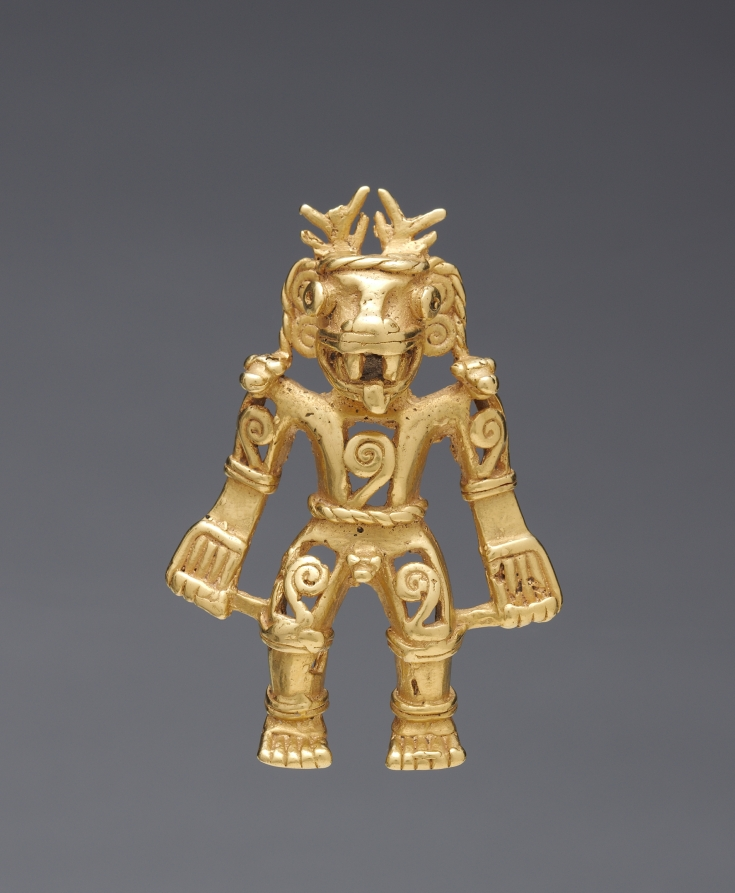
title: Figural Pendant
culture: Panama, Darién or Venado Beach region, Openwork style, 5th-8th Century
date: 400–700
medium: cast gold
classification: Metalwork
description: This emphatically male figure combines a human body with a composite animal head. The antlers are the stag's; the snout, perhaps a snarling feline's; and the hair is formed of braided serpents whose heads hiss from the figure's shoulders. The extended tongue may convey aggression or perhaps death because dying animals are depicted with lolling tongues. Either condition is in keeping with the creature's ferocity.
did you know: This ornament was made with the lost-wax casting technique.